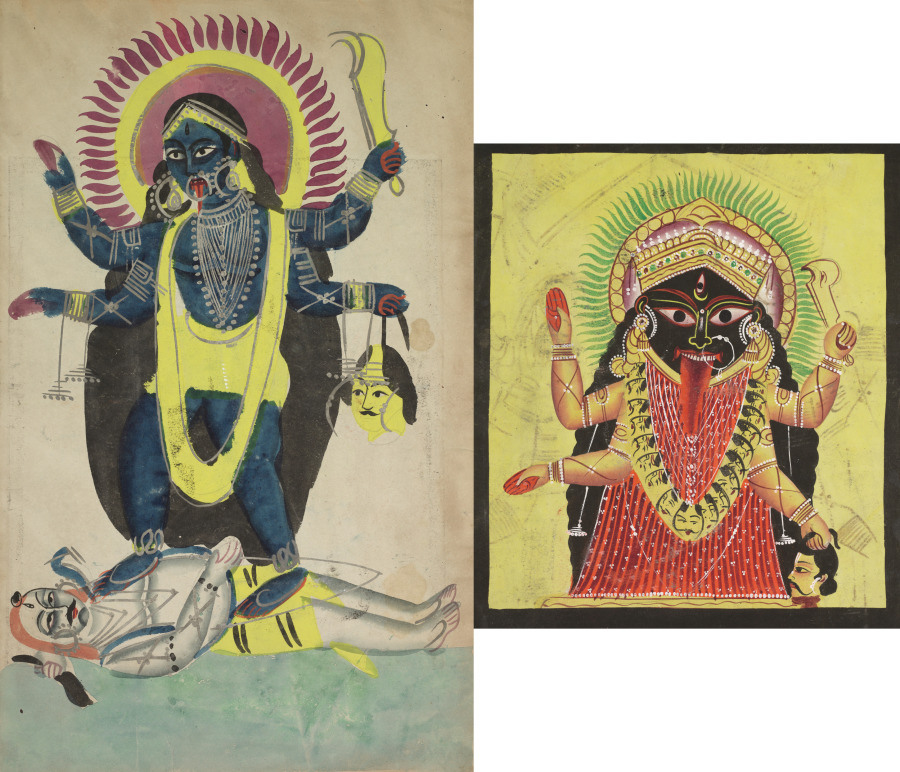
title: Leaf from a Kalighat album: Two Aspects of Kali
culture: Eastern India, Bengal, Kolkata, Kalighat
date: c. 1890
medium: Gum tempera, graphite, and ink on paper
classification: Painting